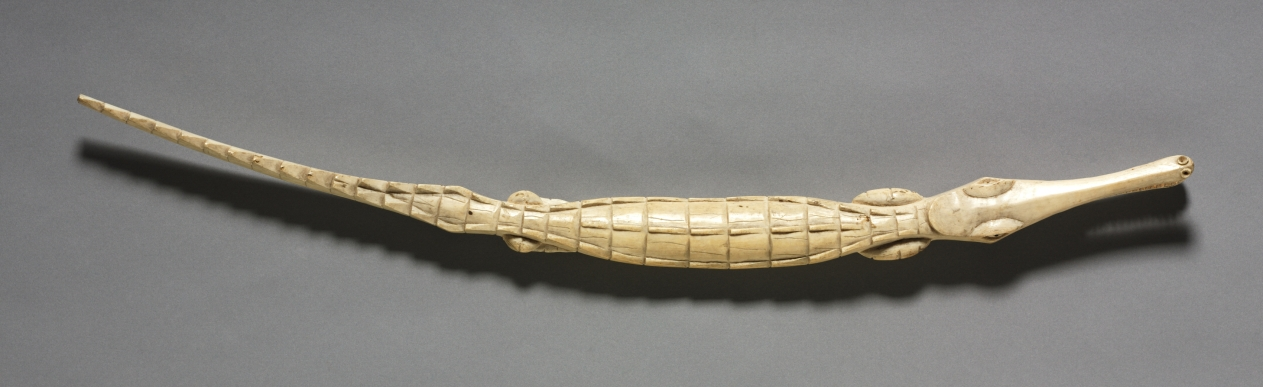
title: Alligator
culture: Africa, Central Africa, Democratic Republic of Congo, unknown maker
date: 1900s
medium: Elephant ivory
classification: Sculpture